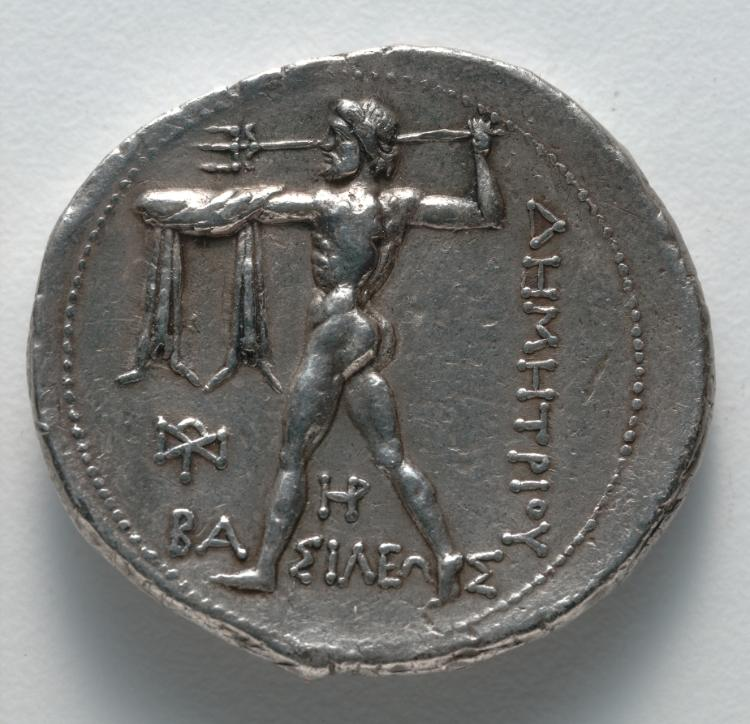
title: Tetradrachm: Poseidon, Striding with Trident (reverse)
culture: Greek, Macedonian, minted at Salamis (Cyprus), reign of Demetrios Poliorketes ("The Beseiger")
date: c. 300–295 BCE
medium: silver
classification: Coins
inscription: ΒΑΣΙΛΕΩΣ | ΔΗΜΗΤΡΙΟΥ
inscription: Χ perpendicular to Ρ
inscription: ΗΡ